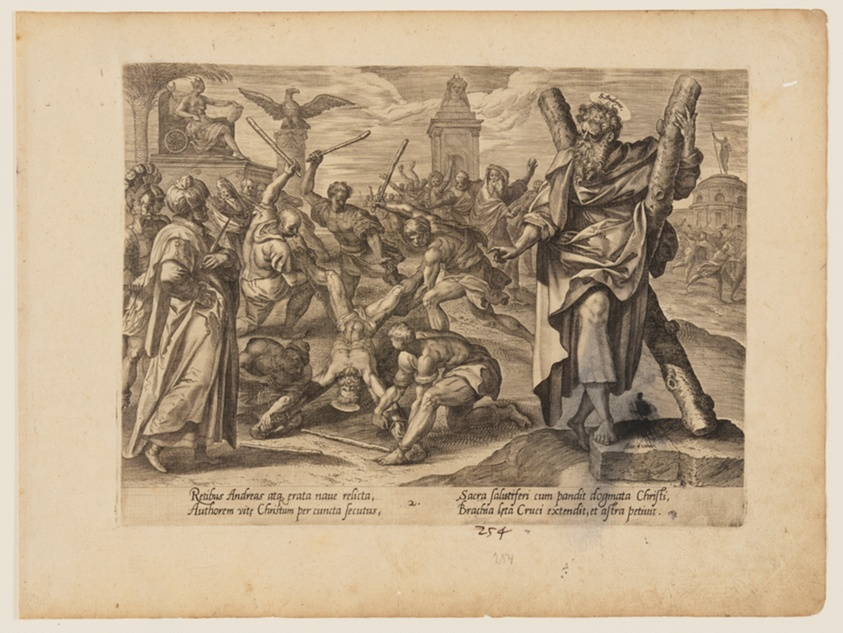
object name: Print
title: The Martyrdom of St Andrew, from The Martyrdom of Christ and the Apostles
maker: Hendrick Goltzius (Dutch, 1558–1617); after Maarten de Vos (Flemish, 1532–1603); published Hieronymus Cock (Netherlandish, c. 1510–1570)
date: c. 1578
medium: Engraving on ivory laid paper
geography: Netherlands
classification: engraving; paper; print; prints and drawing